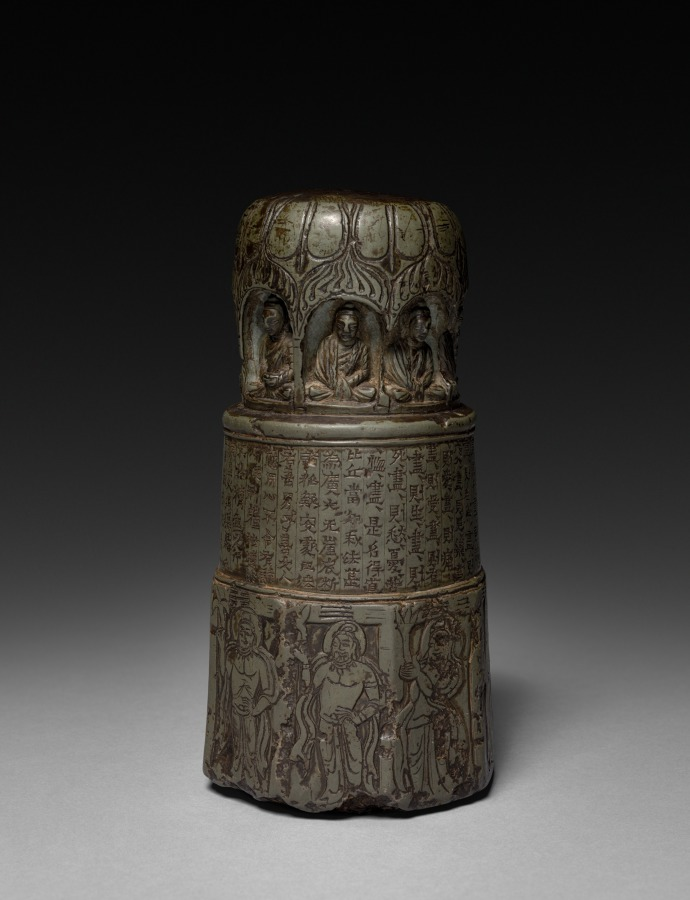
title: Miniature Votive Stupa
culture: China, Gansu province, Northern Wei dynasty (386-534)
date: 435 CE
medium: steatite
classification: Sculpture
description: This sutra pillar, inscribed with a sacred Buddhist text, belongs to a group of miniature stupas (jingta) that were found exclusively in the Gansu corridor, Northwest China. Ranging in date between AD 426–36, some of them bear the names of the lay Buddhist donors who commissioned them. A stupa is an architectural round structure built for the veneration of Buddhist relics. Miniature stupas may have commemorated the visit of a sacred site or represented donations to religious communities and sites.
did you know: There are trigrams, three horizontal lines, broken or continuous, above each of the eight bodhisattvas in the stupa's lower section.